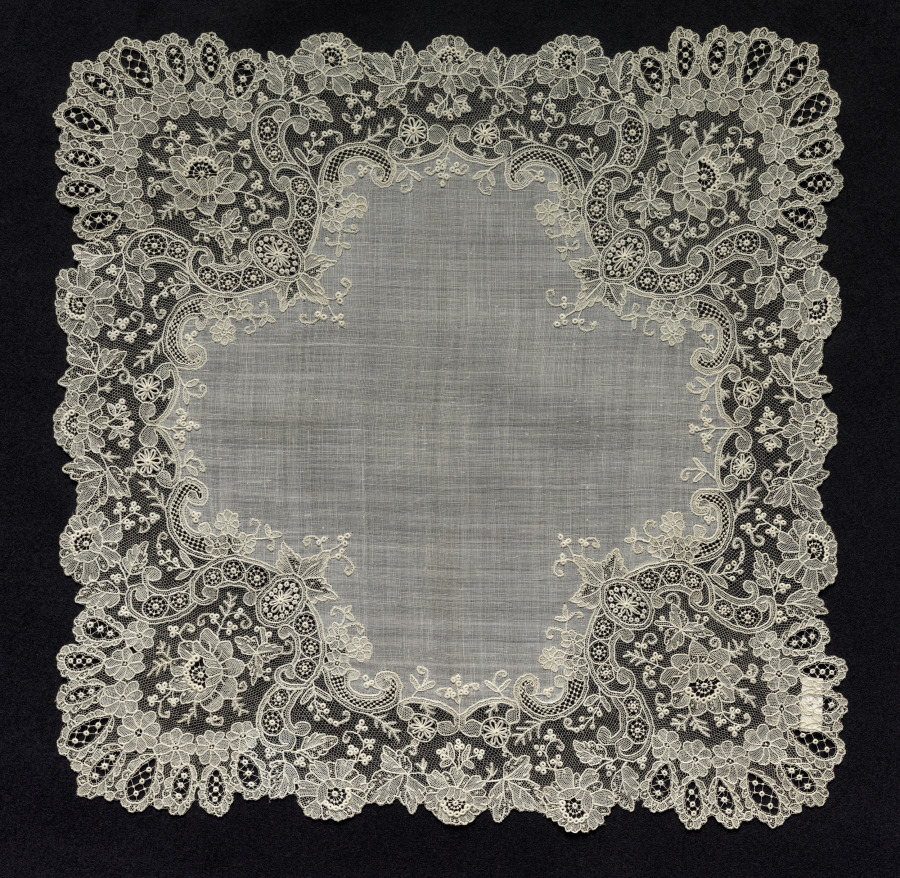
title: Lace Handkerchief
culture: Belgium, Brussels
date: 1860–99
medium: Plain weave linen center; linen needle lace (point de gaze) border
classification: Lace